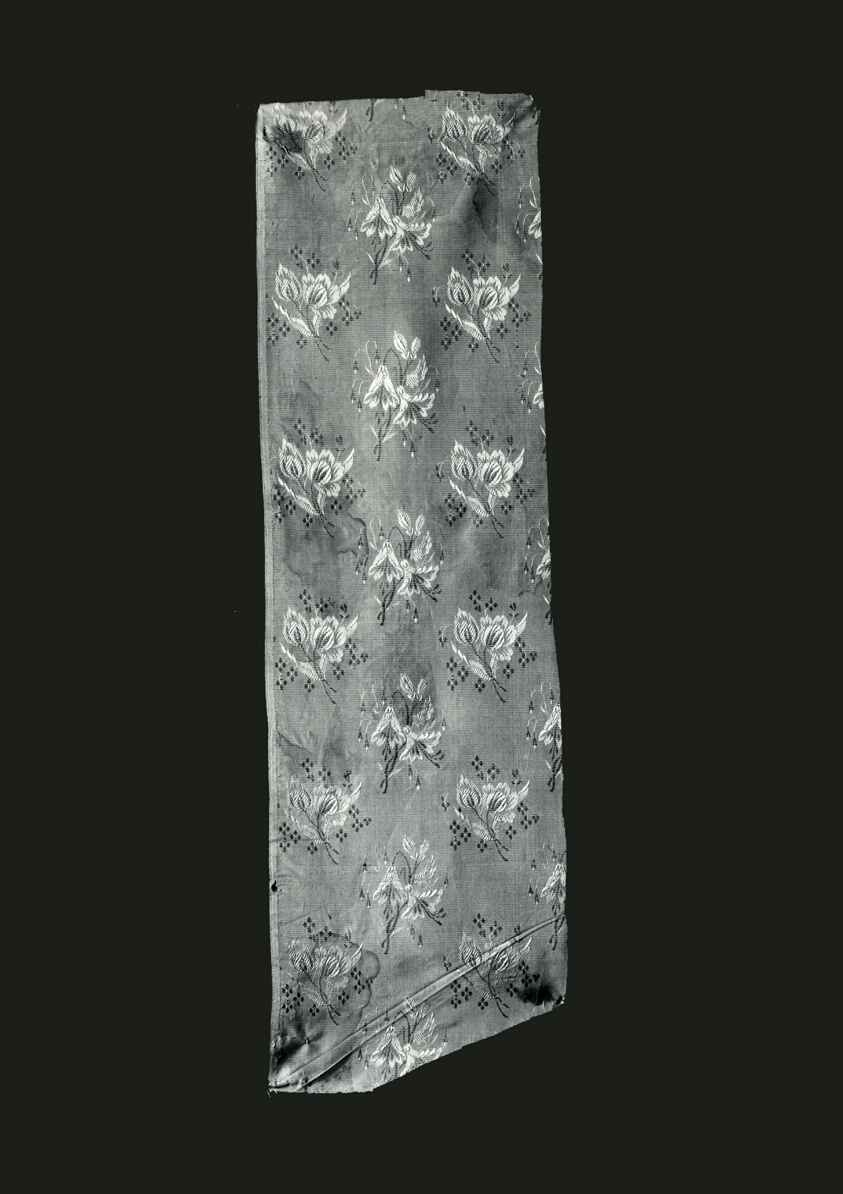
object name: Textile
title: Panel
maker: England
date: 1830/40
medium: Silk, plain weave self-patterned by main warp and ground weft floats, areas of twill weave, and areas of satin weave; woven on loom with Jacquard attachment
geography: England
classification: textile; weaving